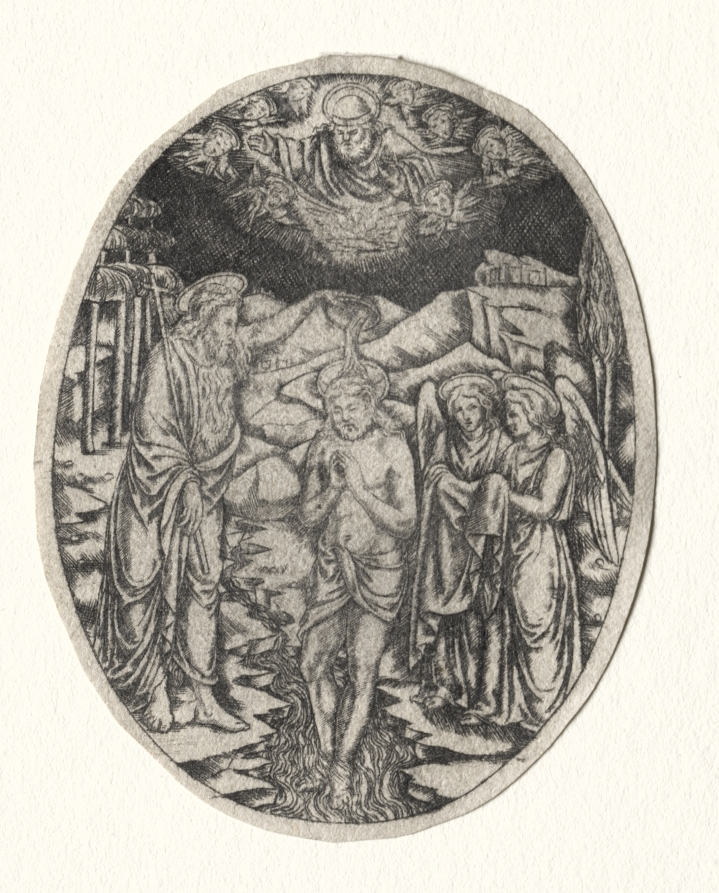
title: Baptism of Christ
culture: Italy, 15th century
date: 1400s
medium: engraving - Niello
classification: Print